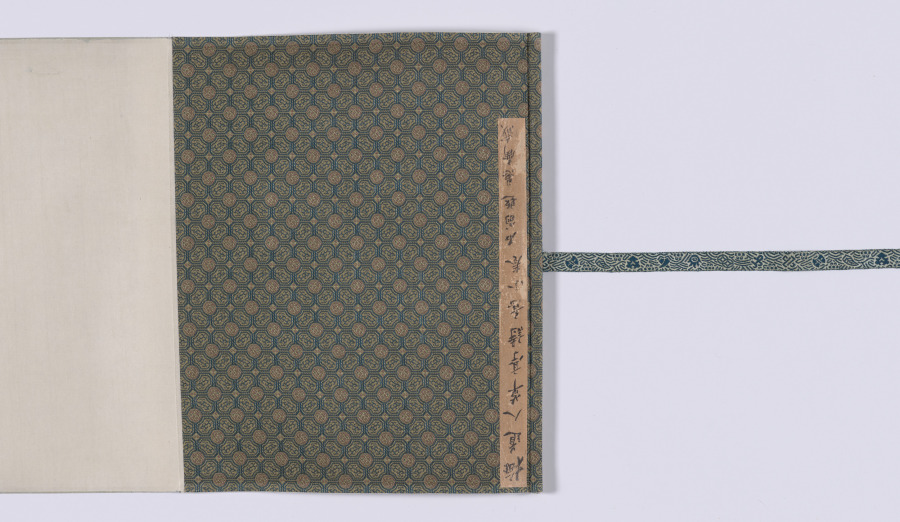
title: Poetic Feeling in a Thatched Pavilion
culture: China, Yuan dynasty (1271-1368)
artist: Wu Zhen (Chinese, 1280–1354)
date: 1347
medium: handscroll; ink on paper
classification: Painting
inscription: 依村構草亭，端方意匠宏。 林深禽鳥樂，塵遠竹松輕。 泉石俱延賞，琴書悅性情。 何當謝凡近，任適慰平生。 至正七年丁亥冬十月，為元澤戲作草亭詩意。梅沙彌書 [印]楳華盦; 嘉興吳鎮仲圭書畫記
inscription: 我愛梅花翁，巨老傳心印。 脩此水墨缘，種種得蒼潤。 樹石墮筆鋒，造化不能吝。 而今橡林下，我願執掃汛。 後學沈周 [印]启南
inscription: Colophon by Chen Rentao (1952): 予求梅道人畫二十年不可得。所見多膺鼎，即故宮所藏山水數軸都不可靠。傳世真迹，惟《漁父圖》、《嘉禾八景》與此《草亭詩意》而已。壬辰十月十四日余大病初愈，居家休養，研山師忽持此圖相贈。展卷披覽，頓覺精神沛振，如服僊藥。同日又得宋拓柳公權《神策軍紀聖德碑》，及群玉堂藏《真草書千(字)文》，皆海內孤本。一日得數寶，欣喜何如，書以志幸。 陳仁濤識 [印]陳氏仁濤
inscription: Colophon by Chen Rentao: 此圖作於至正七年丁亥，時年六十八，盖其晚年神品也。 濤又識 [印]陳仁濤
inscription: Title on frontispiece by Li Dongyang 李東陽 (1447-1516).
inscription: 33 additional seals: 1 seal of Li Chao-heng 李肇亨 (1592-1664)：檇李李肇亨書畫記; 9 seals of Liang Qingbiao 梁清標 (1620-1691): 蒼巖子、蕉林、蕉林梁氏書畫之印、蕉林秘玩、蕉林書屋、蕉林玉立氏圖書、棠邨 (appears twice)、棠邨審定; 1 seal of Wang Yirong (1845-1900): 懿榮; 3 seal of Li Yanshan (1898-1961): 雙銕笛樓 (appears twice)、硯山心賞; 12 seals of Chen Rentao 陳仁濤（1906-1968）：陳氏仁濤、陳仁濤珍藏印、金匱寶藏·陳氏仁濤 (appears three times)、金匱秘笈、金匱室、金匱室精鑒璽 (appears twice)、金匱室主、金匱神品、仁濤奇緣; 1 seal: 崐溟居士; 1 seal: 林止在㭯生圖書印; 3 seals unidentified.